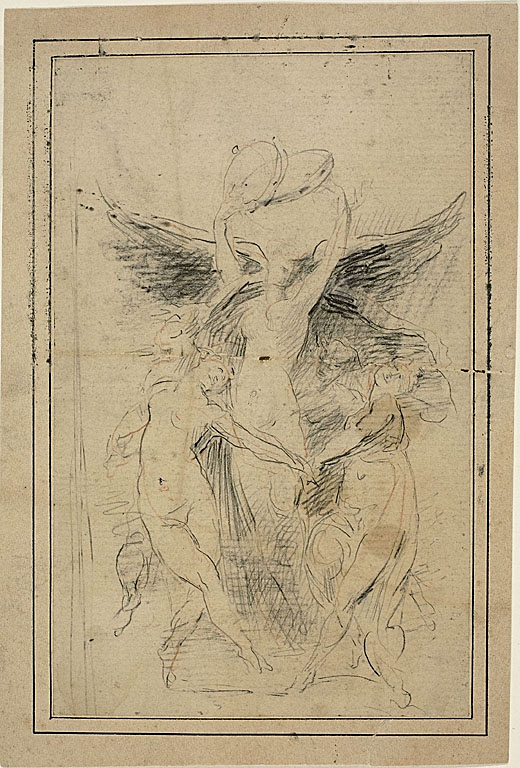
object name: Drawing and Watercolor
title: Five Dancing Female Figures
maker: Jean Baptiste Carpeaux (French, 1827-1875)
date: 1865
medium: Black and red chalk on tan laid paper, laid down on tan wove paper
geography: France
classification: chalk; drawings (visual works); prints and drawing